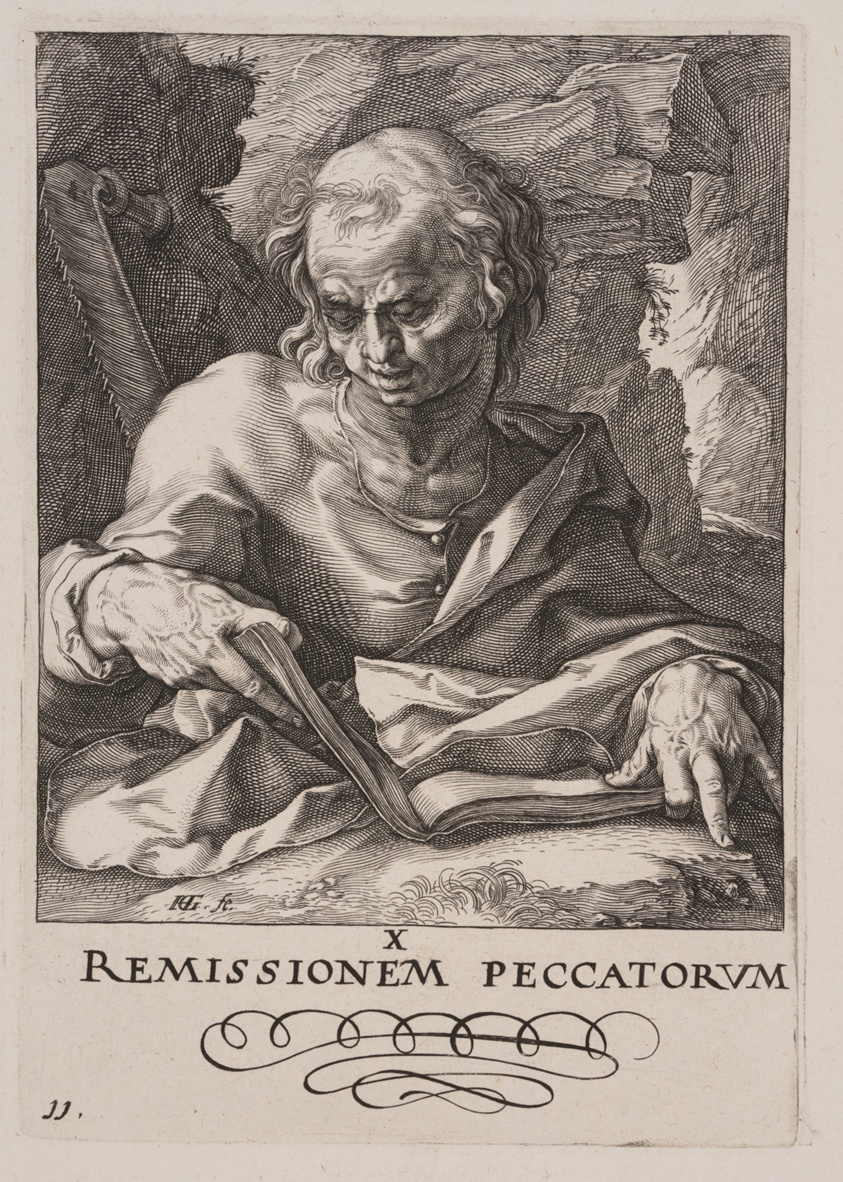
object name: Print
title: St Simon, from Christ, the Apostles and St Paul with the Creed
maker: Hendrick Goltzius (Dutch, 1558–1617)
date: 1589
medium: Engraving on ivory laid paper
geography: Netherlands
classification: print; paper; prints and drawing; engraving